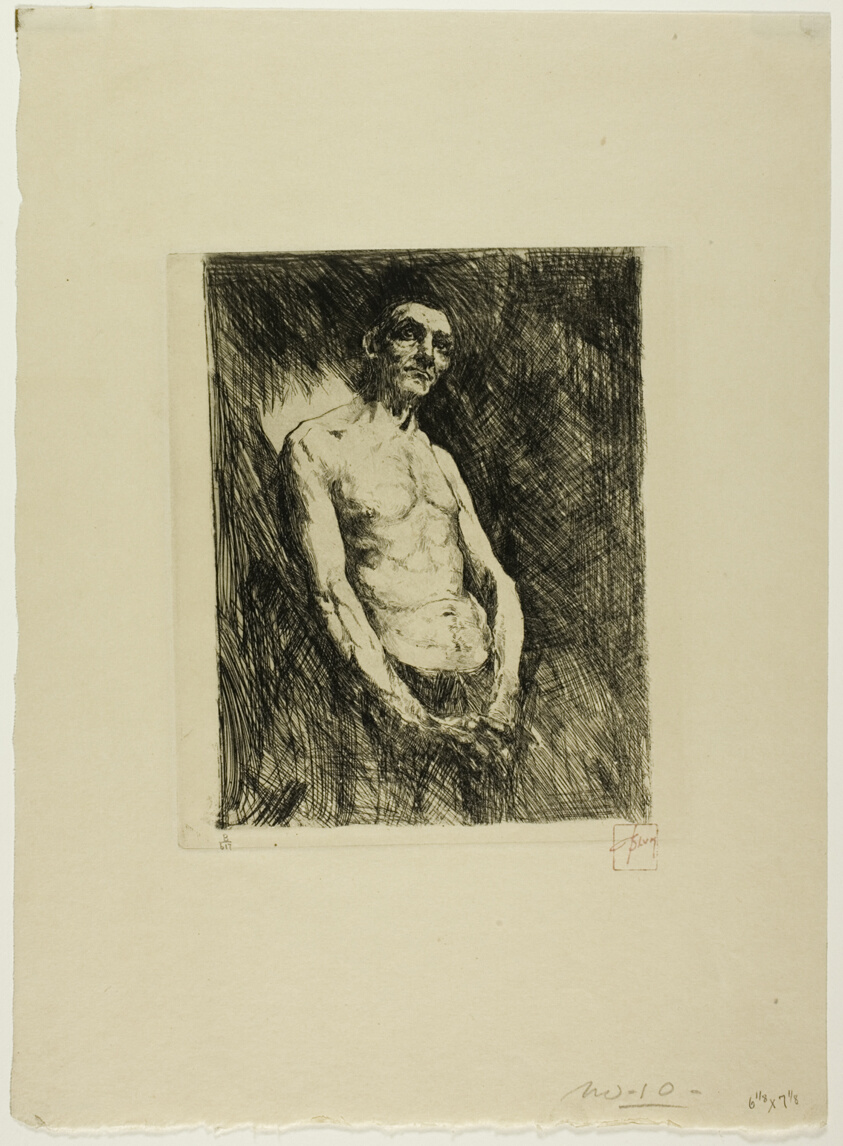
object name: Print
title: Half Nude Figure of a Man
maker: Robert Frederick Blum (American, 1857-1903)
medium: Etching on cream wove paper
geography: United States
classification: etching; print; prints and drawing